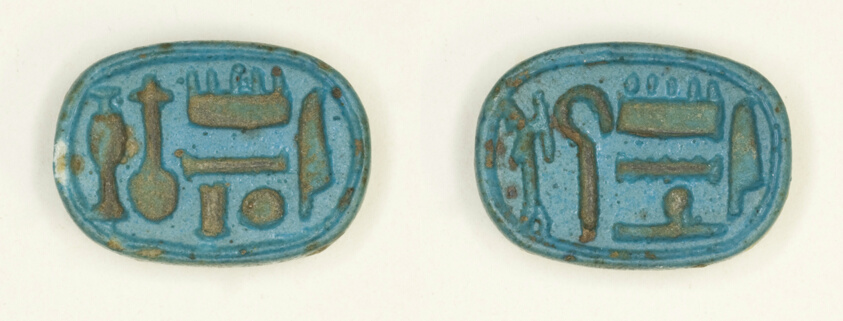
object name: Costume and Accessories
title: Plaque: Amun Re, Good of Praise/ Amunhotep Ruler of Thebes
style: new kingdom, eighteenth dynasty, egyptian, ancient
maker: Egyptian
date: New Kingdom, Dynasty 18, reign of Amenhotep III (about 1390–1352 BCE)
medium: Steatite?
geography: Egypt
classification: plaque (flat object); amulet; ancient art; costume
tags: Hieroglyphs